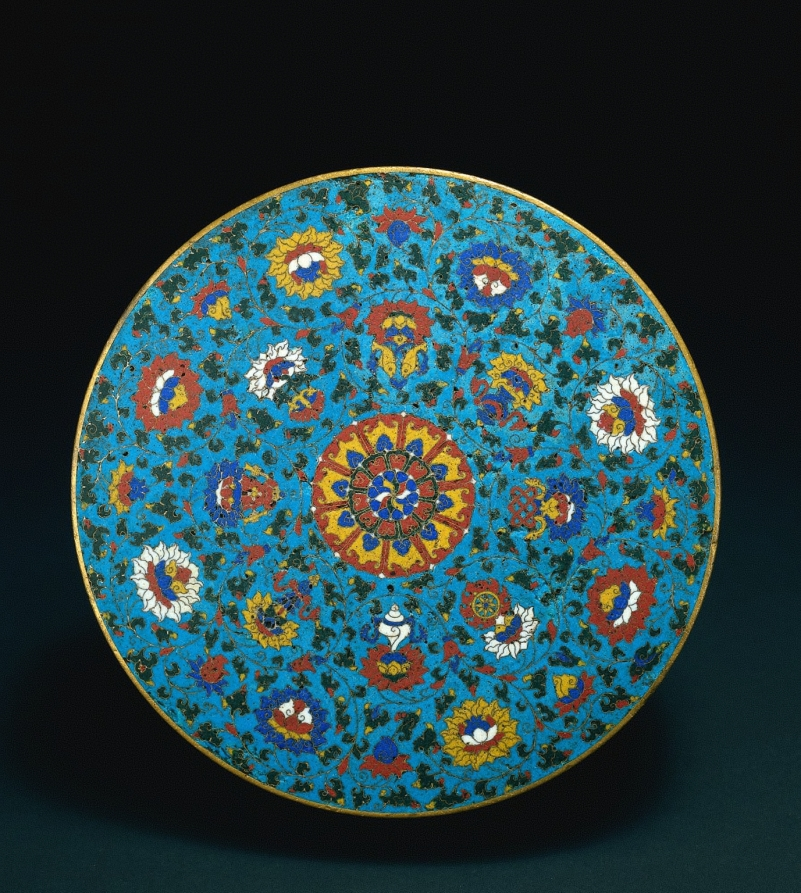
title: Mandala Base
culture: China, Ming dynasty (1368–1644)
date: early 1400s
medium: cloisonné enamel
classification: Enamel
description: A ritual object of Tibetan Buddhism, this cloisonné disc is used as the base for a three-dimensional mandala composed of miniature buildings. The decoration includes the lotus flowers and the Eight Buddhist Treasures: the wheel, the conch, the umbrella, the canopy, the lotus, the paired fish, the vase, and the endless knot.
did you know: In a meditation ritual known as Offering the Universe, the disc functioned as a mandala or cosmic diagram.